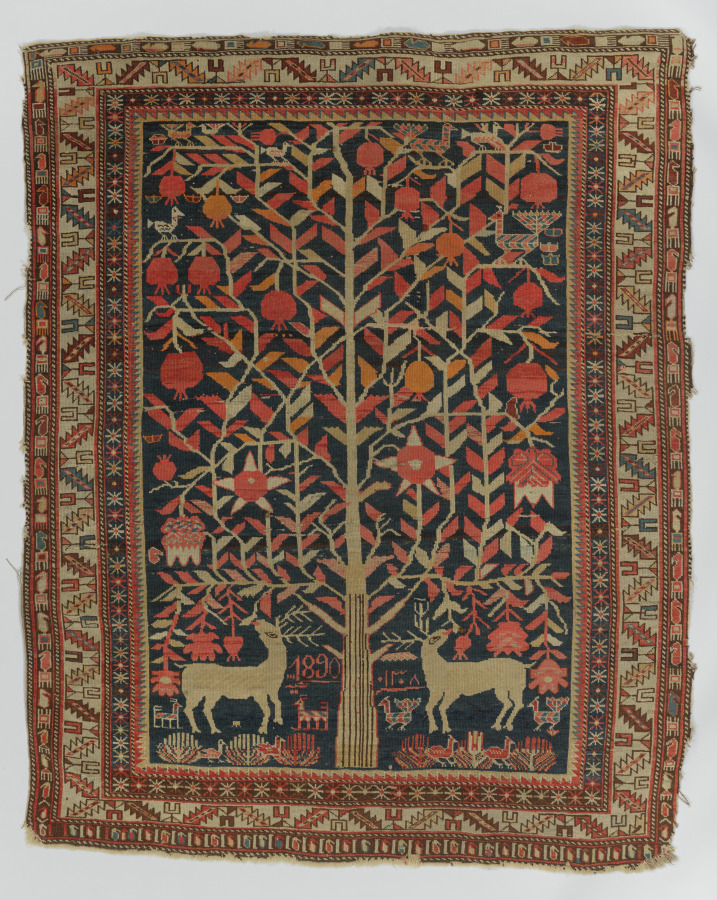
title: Carpet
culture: Azerbaijan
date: 1890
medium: Ghiordez knot: wool and cotton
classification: Carpet